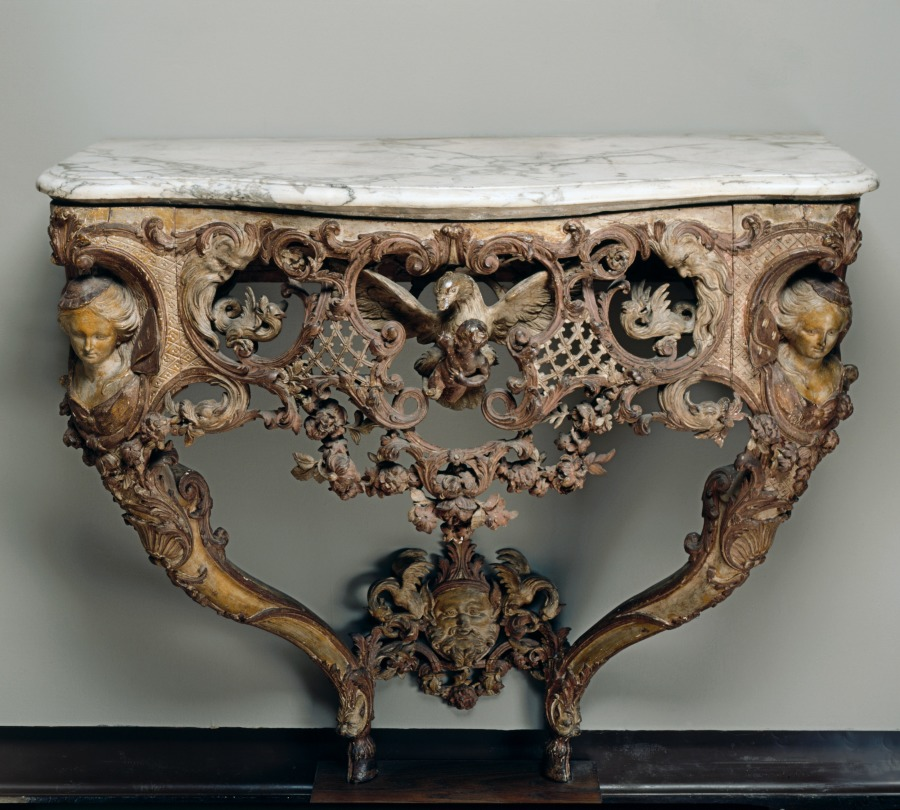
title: Console Table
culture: France, 18th century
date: c. 1720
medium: carved and painted wood, marble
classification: Furniture and woodwork